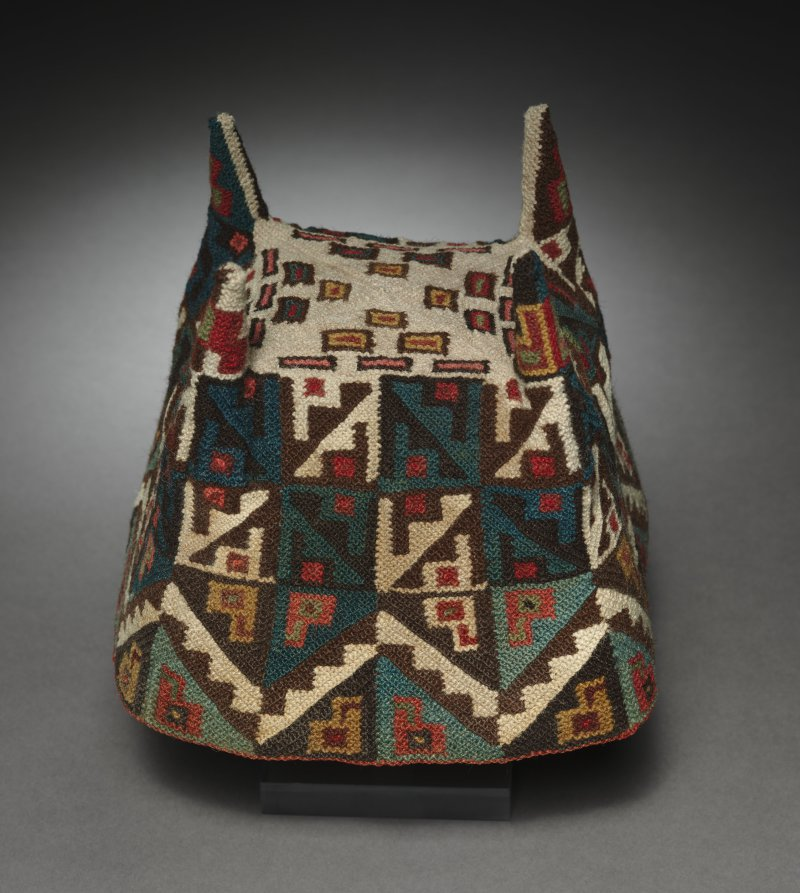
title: Four-Cornered Hat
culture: Peru, South Andes or Chile, Northern Andes, Tiwanaku style, 5th-10th Century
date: c. 400–1000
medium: alpaca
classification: Textile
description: A distinctive type of Tiwanaku and Wari headgear was a hat with four ear-like peaks rising from the corners. Depicted on warriors and other men who wear prestigious clothing and ornaments, the hats were made with knots, visible on all sides of this handsome Tiwanaku example. The hat is decorated with a pattern that includes a profile bird head.